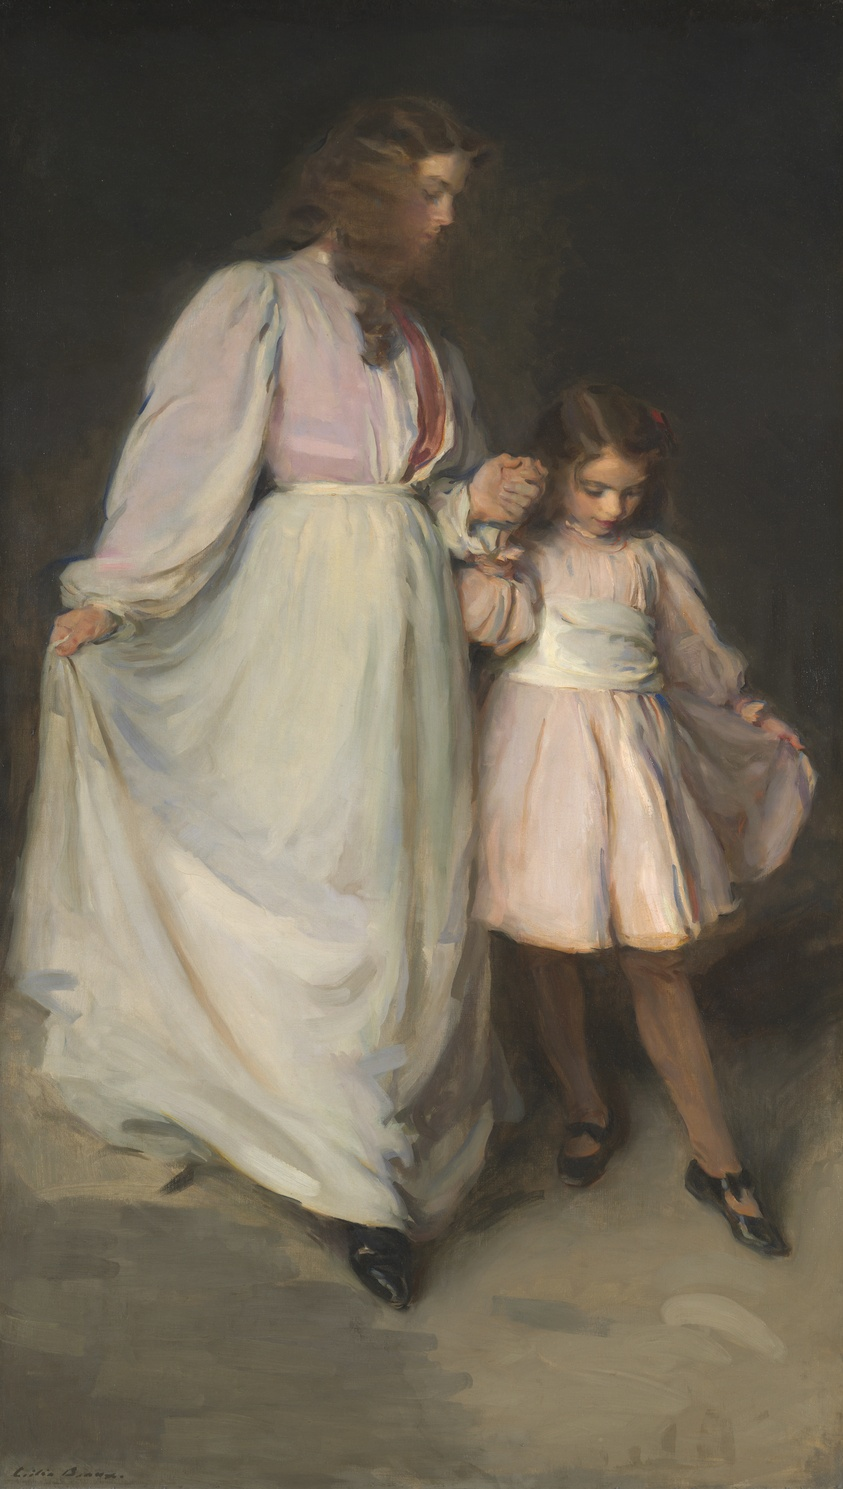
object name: Painting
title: Dorothea and Francesca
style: Impressionism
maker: Cecilia Beaux (American, 1855–1942)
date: 1898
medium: Oil on canvas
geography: Massachusetts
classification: painting; american arts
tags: fashion, dancers, families, portraits, children, people